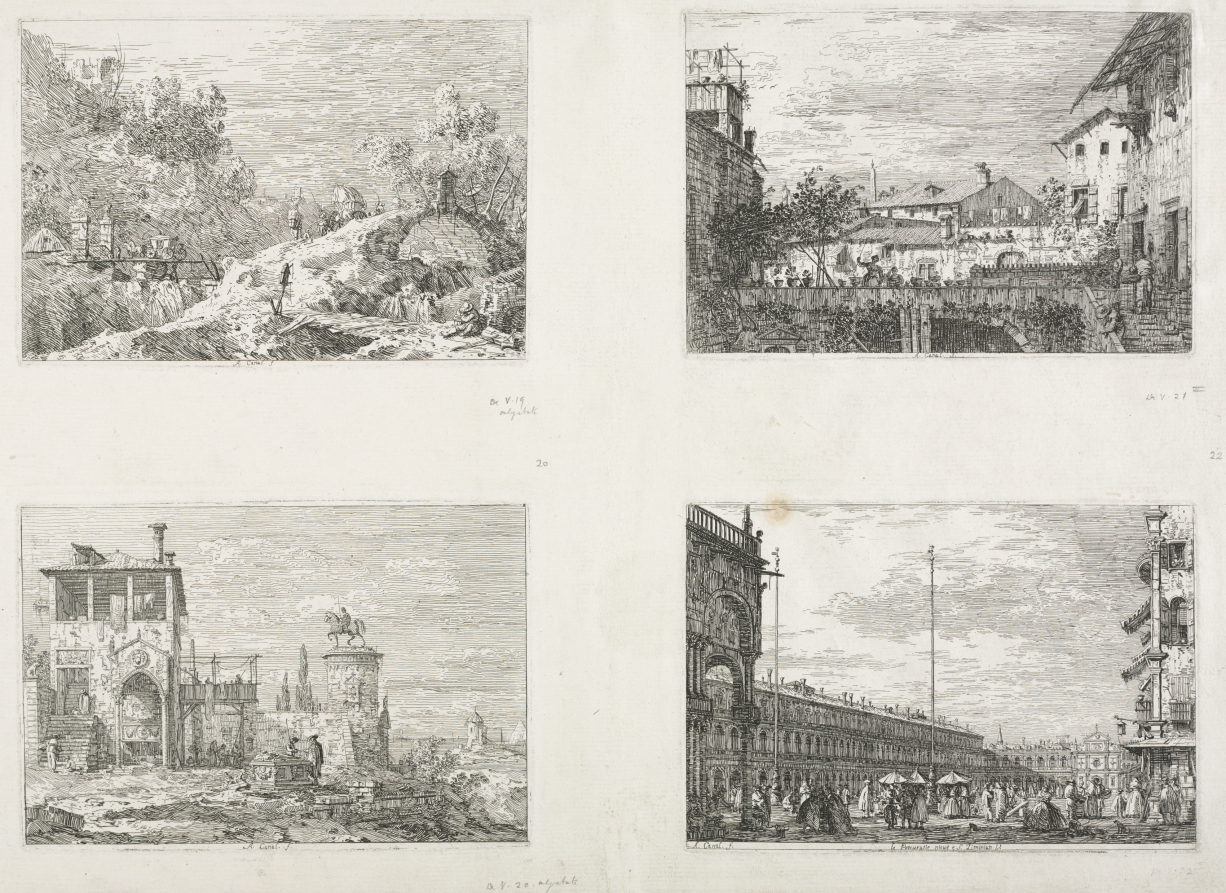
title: Views: Mountain Landscape with Five Bridges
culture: Italy, Venice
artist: Antonio Canaletto (Italian, 1697–1768)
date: 1735–1746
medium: etching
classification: Print